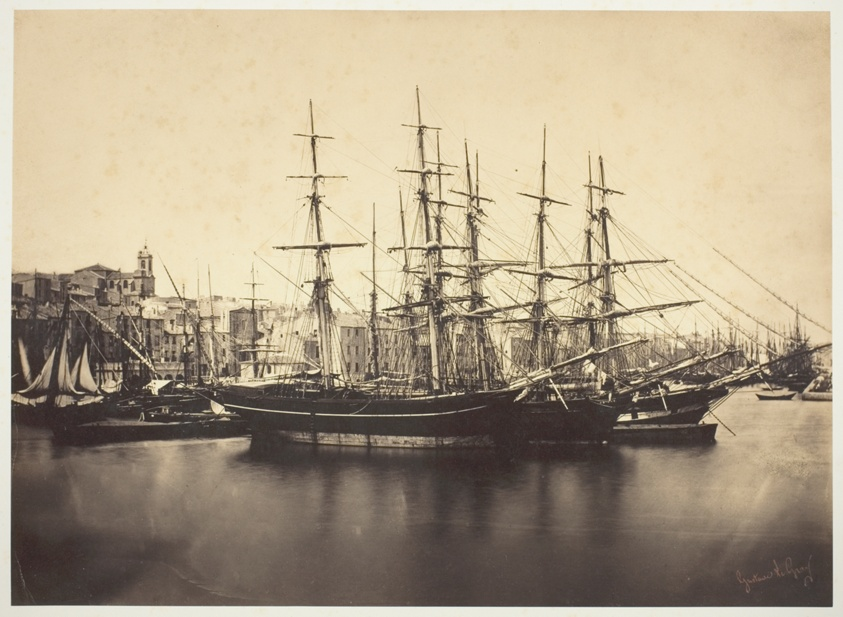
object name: Photograph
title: Ships in the Harbor at Sète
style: 19th century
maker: Gustave Le Gray (French, 1820–1884)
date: 1857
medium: Albumen print, No. 10 from the album "Vistas del Mar"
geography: France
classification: albumen silver print; photographic process; photography; photograph